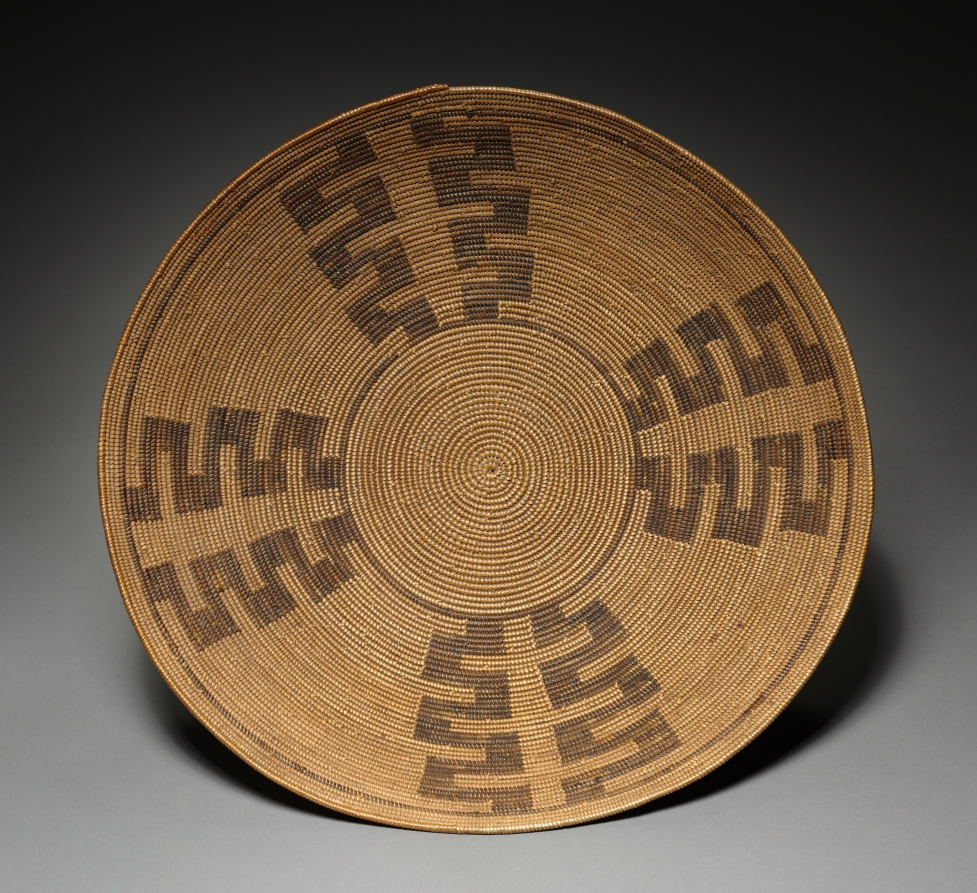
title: Tray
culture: California, Mission, San Diego, Late 19th- Early 20th century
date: c 1875– 1925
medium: Juncus, Sumac; Coiled, Deergrass Foundation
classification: Basketry